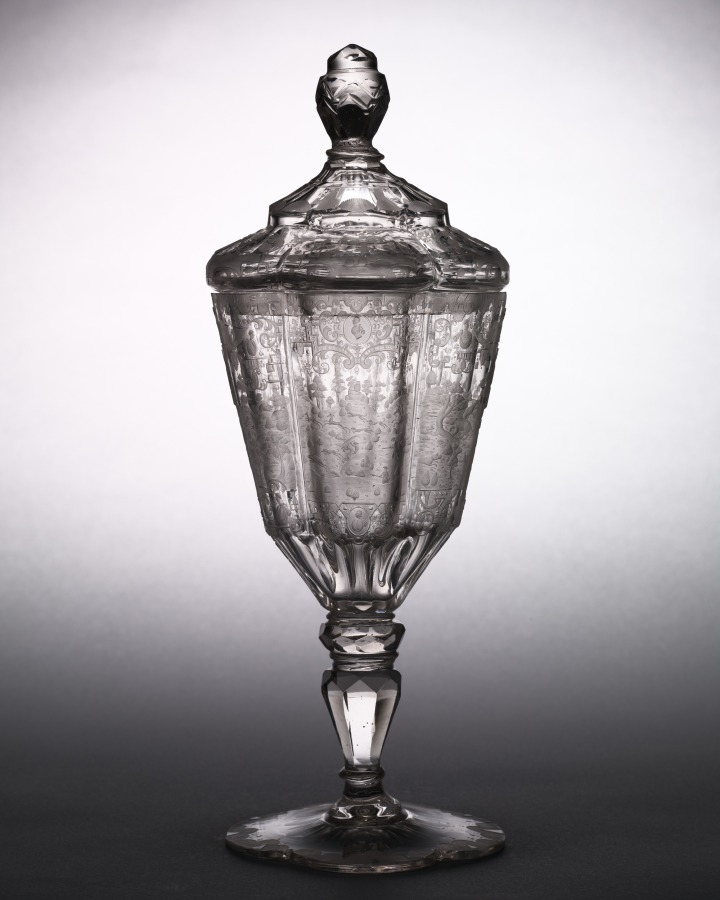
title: Standing Cup with Cover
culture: Germany, Silesia, 18th century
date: c. 1725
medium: glass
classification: Glass